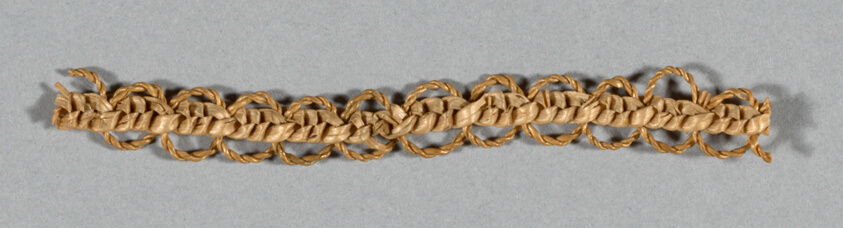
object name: Textile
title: Fragment (Bonnet Trim)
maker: Probably Europe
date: 1850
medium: Straw, three-dimensional braid laced with straw yarns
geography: Europe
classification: textile; headdress - misc; costume accessory - headdress